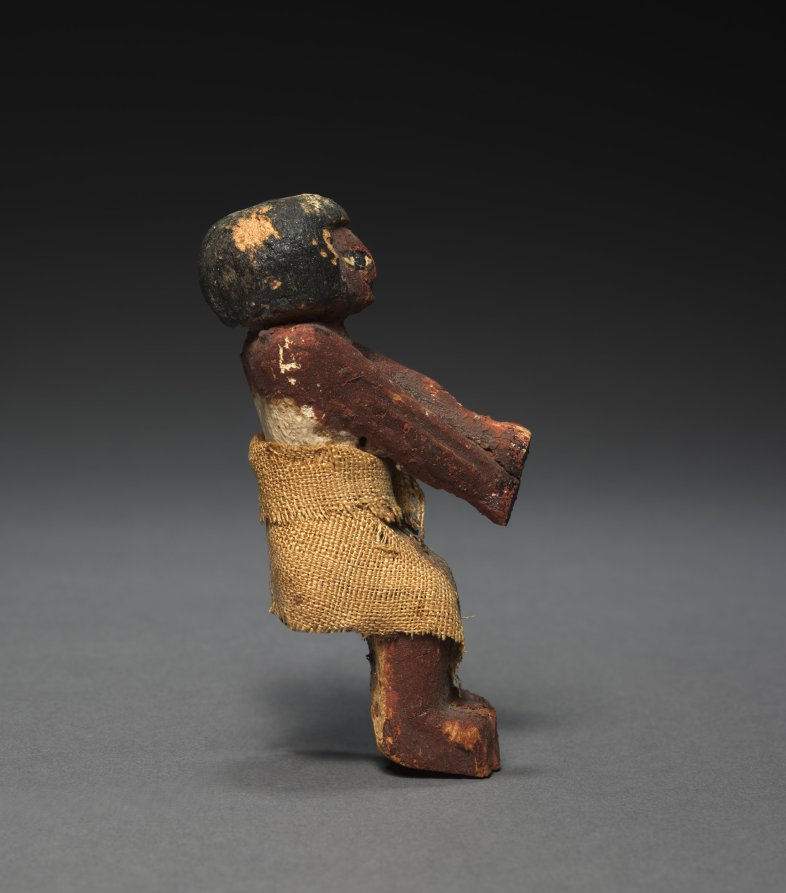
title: Seated Model Sailor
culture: Egypt, Middle Kingdom (2040–1648 BCE), Dynasties 11–12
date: c. 2000–1000 BCE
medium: painted sycamore fig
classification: Funerary Equipment